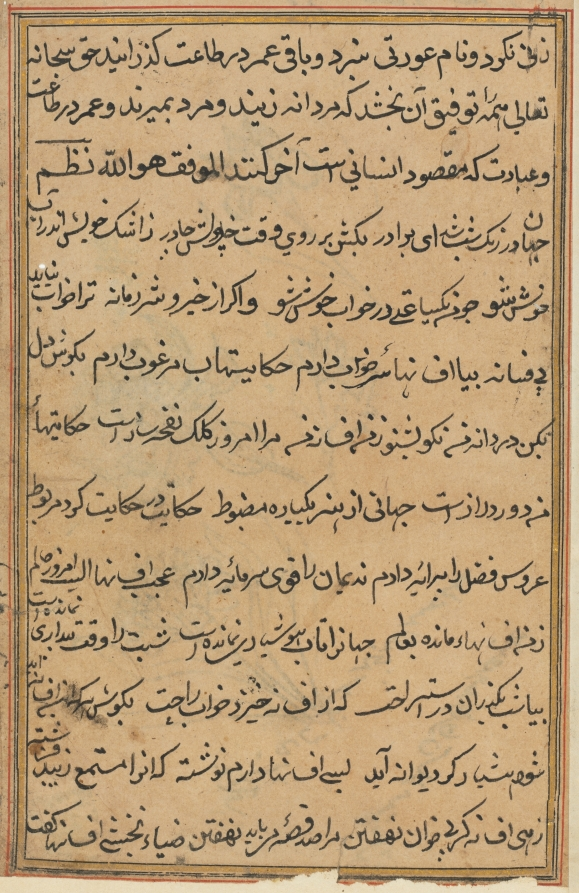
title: Page from Tales of a Parrot (Tuti-nama): text page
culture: Mughal India, court of Akbar (reigned 1556–1605)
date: c. 1560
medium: gum tempera, ink, and gold on paper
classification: Painting